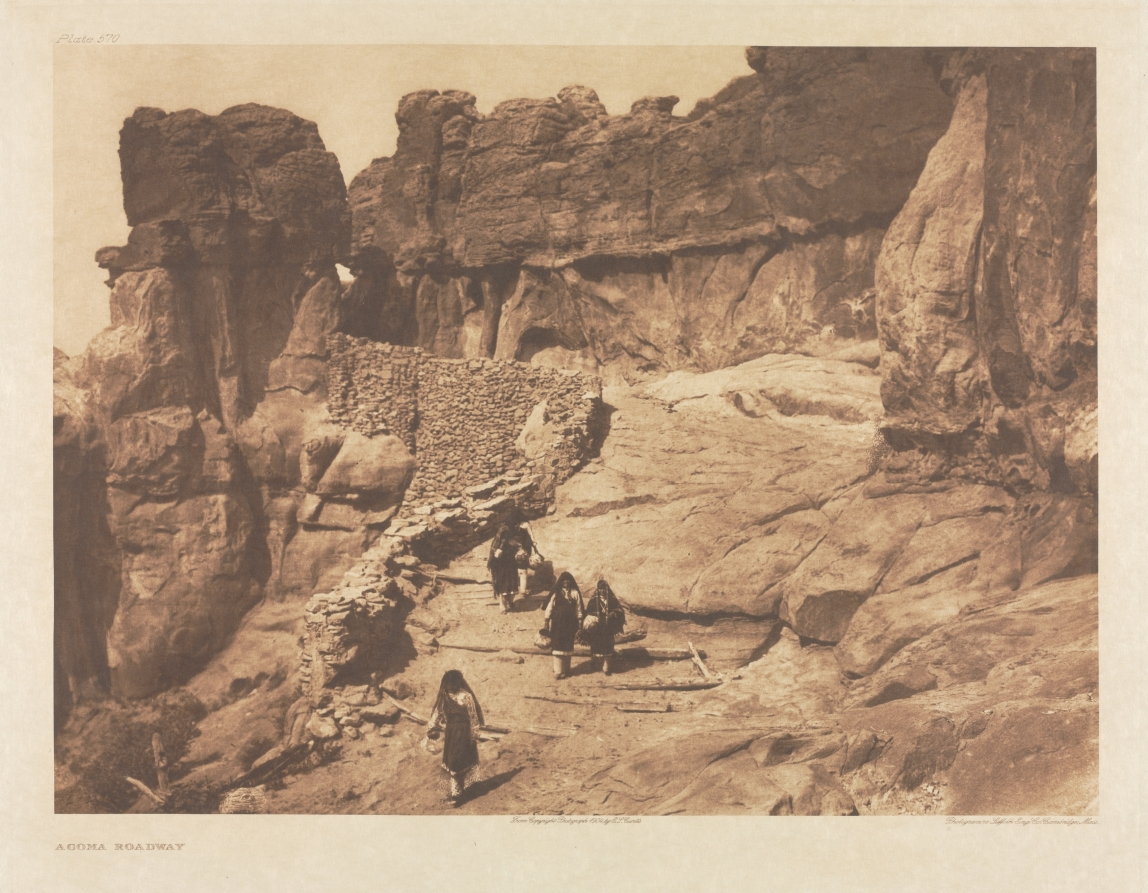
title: Portfolio XVI, Plate 570: Acoma Roadway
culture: America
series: The North American Indian: being a series of Portfolios picturing and describing the Indians of the United States, the Dominion of Canada, and Alaska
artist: Edward S. Curtis (American, 1868–1952)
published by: The University Press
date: 1904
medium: photogravure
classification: Portfolio